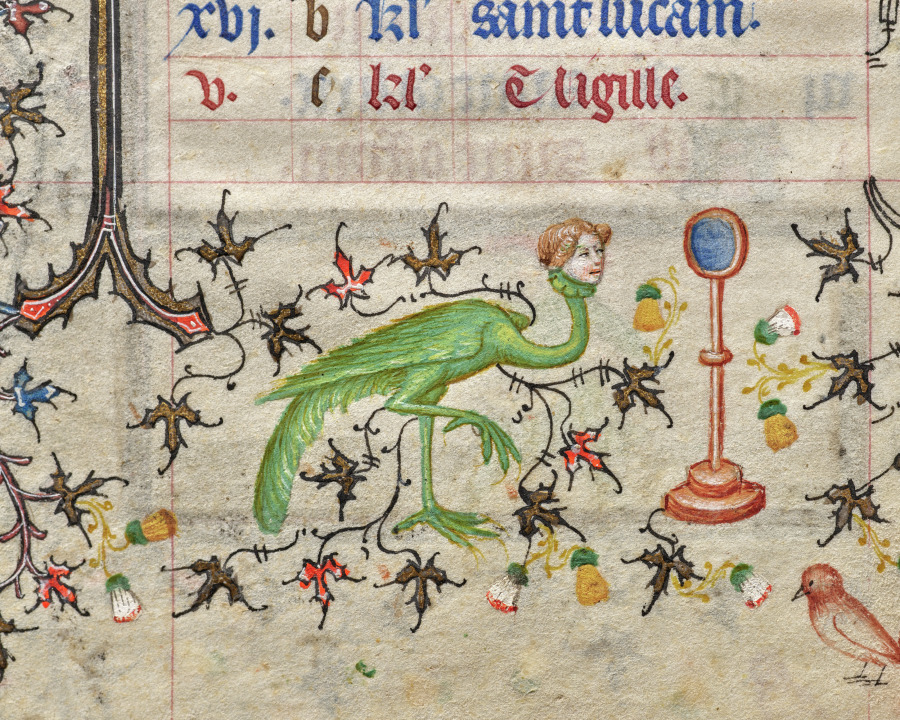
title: Hours of Charles the Noble, King of Navarre (1361-1425): fol. 10v, October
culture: France, Paris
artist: Master of the Brussels Initials and Associates (French)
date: c. 1405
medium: ink, tempera, and gold on vellum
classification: Bound Volume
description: This precious book was highly prized by its owner, Charles III, King of Navarre, a French-born prince whose coat of arms is painted on 20 folios. Charles visited Paris on numerous occasions and likely acquired this volume there in 1404. Paris was the center of the European book trade at the time and attracted illuminators from many parts of Europe. This manuscript represents one of the most remarkable fusions of French and Italian taste in book illumination. Though conforming to Parisian standards, most of the book’s major miniatures are the work of the Brussels Initials Master, an Italian illuminator who previously worked in Bologna and Padua.